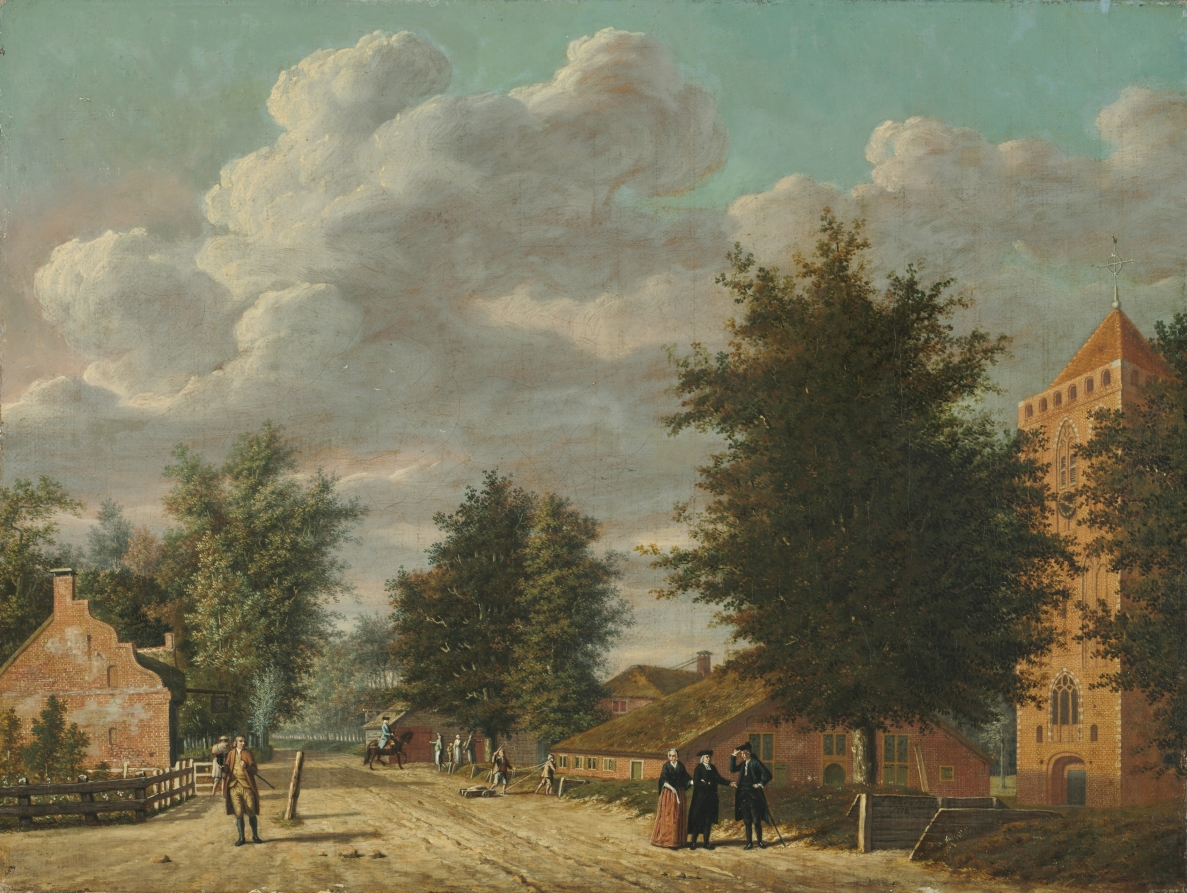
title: View of the Village of Eemnes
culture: Netherlands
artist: Jordanus Hoorn (Dutch, 1753–1833)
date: 1778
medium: oil on canvas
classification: Painting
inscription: Signed on wooden fence in lower right: J.: Hoorn. fi/ 1778